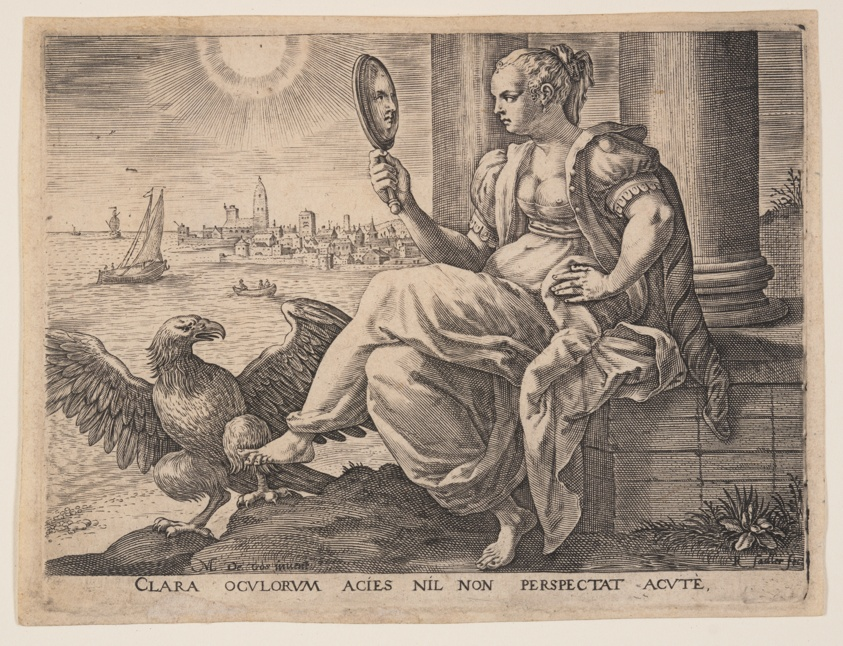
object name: Print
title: Sight, from The Five Senses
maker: Raphael Sadeler I (Flemish, 1560/61–1628/32); after Maarten de Vos (Flemish, 1532–1603)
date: 1581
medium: Engraving on paper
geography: Flanders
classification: engraving; paper; print; prints and drawing